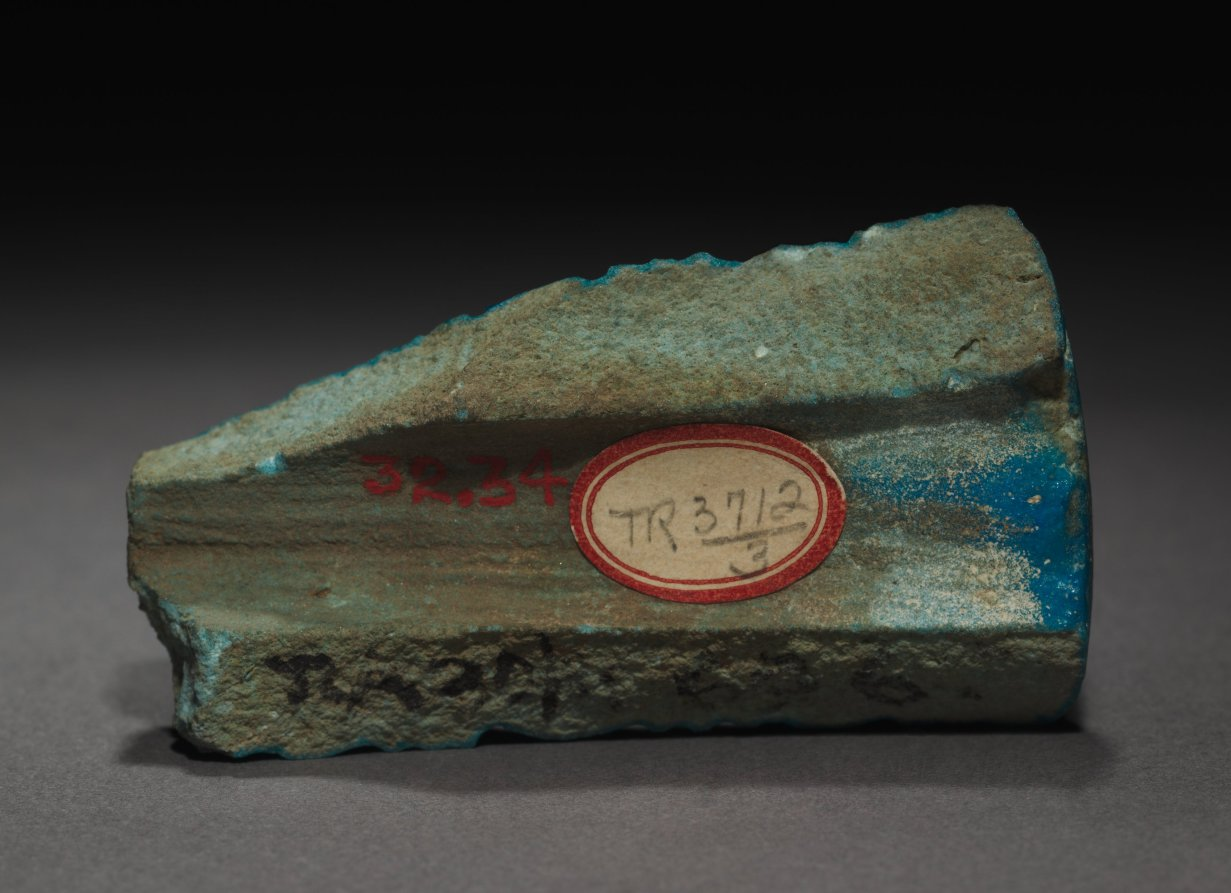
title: Fragment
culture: Egypt, New Kingdom (1540–1069 BCE), Dynasty 18, reign of Akhenaten (1351–1334 BCE)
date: 1353–1337 BCE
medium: turquoise faience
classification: Vessels